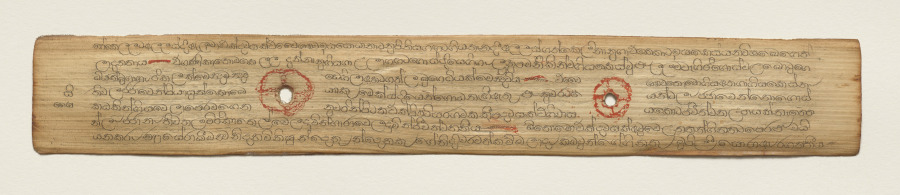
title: Leaf from a Buddhist Manuscript (recto)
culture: Sri Lanka, Singhalese, Late 17th century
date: c. 1700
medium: fiber paper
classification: Manuscript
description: Palm leaf material is still used for manuscripts in Sri Lanka. The palm leaves are prepared first by boiling them, drying them in the sun, and then rubbing them with oils. Scribes then use a metal stylus to incise the text. Then charcoal powder is wiped across the pages, filling in only the inscribed lines.